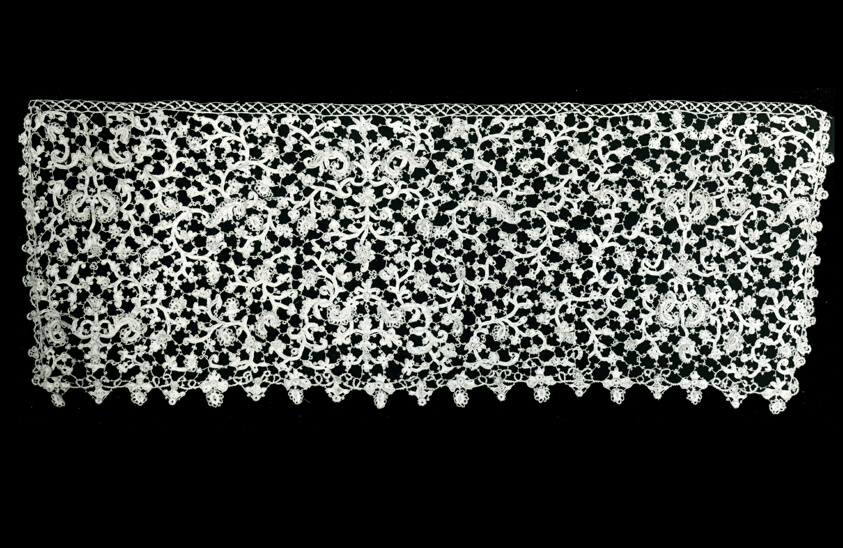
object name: Textile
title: Fragment (Border)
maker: Italy, Venice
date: 1675/1700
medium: Linen, raised needle lace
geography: Venice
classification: textile; lace - needle